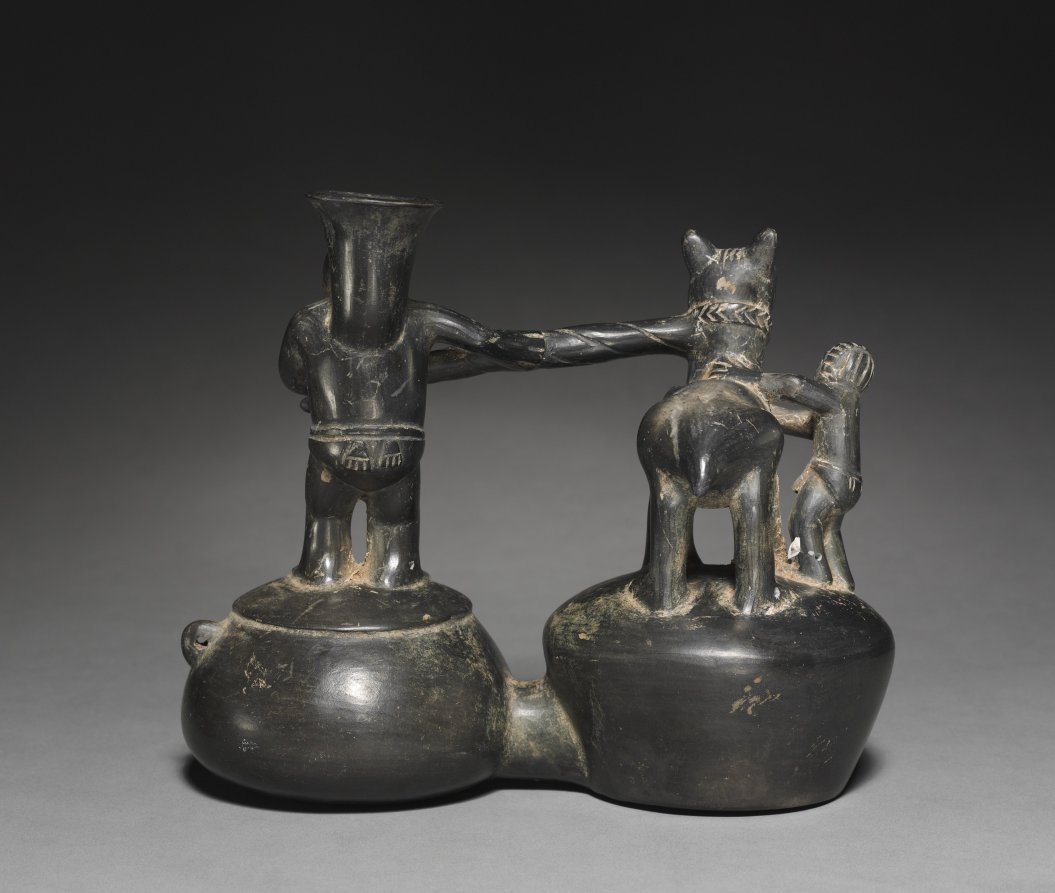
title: Double-chambered Vessel with Figures and Camelid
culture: Andes, Chimú-Inka, late 15th - mid 16th century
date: 1470–1532 (Thermoluminescence date, 1310–1610)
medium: ceramic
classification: Ceramic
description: Under the Chimú, ceramic seems to have been a less important artistic medium than for earlier north coast cultures. Accordingly, ceramics were mass-produced with molds and, rather than bearing painted scenes, often have an overall dark surface achieved by firing in a smoky atmosphere. The double-chambered vessel was made after the Inka conquered the Chimú in the 1460s.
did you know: When this vessel is filled with liquid and tilted back and forth, the camelid emits a whistling sound.